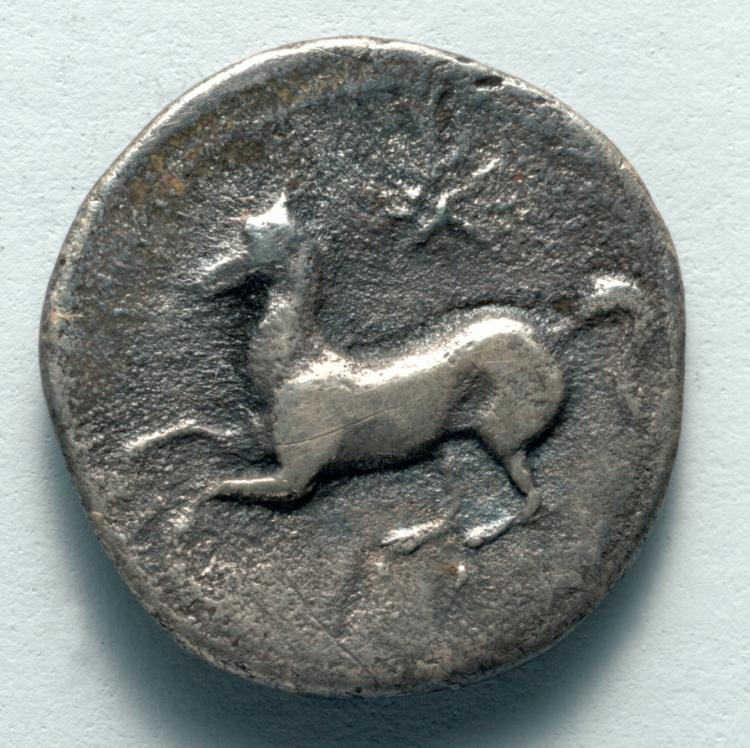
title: Two Litrae: Horse, star (reverse)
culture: Greek, minted at Syracuse (Sicily)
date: 344–317 BCE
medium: silver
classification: Coins